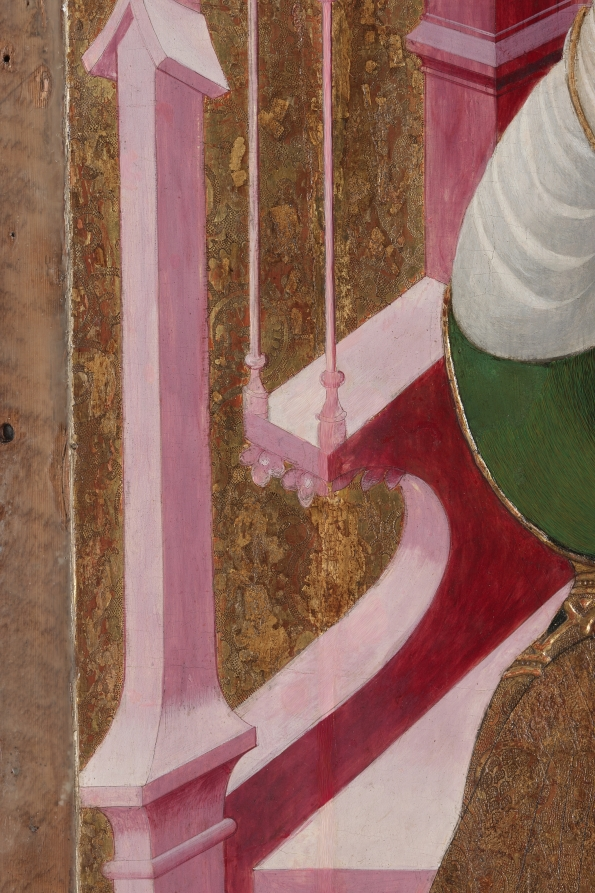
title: A Bishop Saint with a Donor (Saint Louis of Toulouse?)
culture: Spain, Catalonia, early 15th century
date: early 1400s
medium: tempera with raised and gilded gesso on wood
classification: Painting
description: The style of this painting suggests that it comes from Catalonia in northeastern Spain, though the identity of its artist remains unknown. The painting represents a youthful bishop-saint identifiable by a bishop’s symbols of authority, his miter and crozier. He wears rich vestments. Below, the figure in black represents the donor of the painting—likely a wealthy layperson rather than a cleric. The identity of the saintly bishop is speculated to be Saint Louis, Bishop of Toulouse, on the basis of his youth. Louis was consecrated Bishop of Toulouse in 1297, died six months later at the age of 23, and was canonized in 1317. His relics were moved in 1423 to Valencia and his cult flourished in Spain.